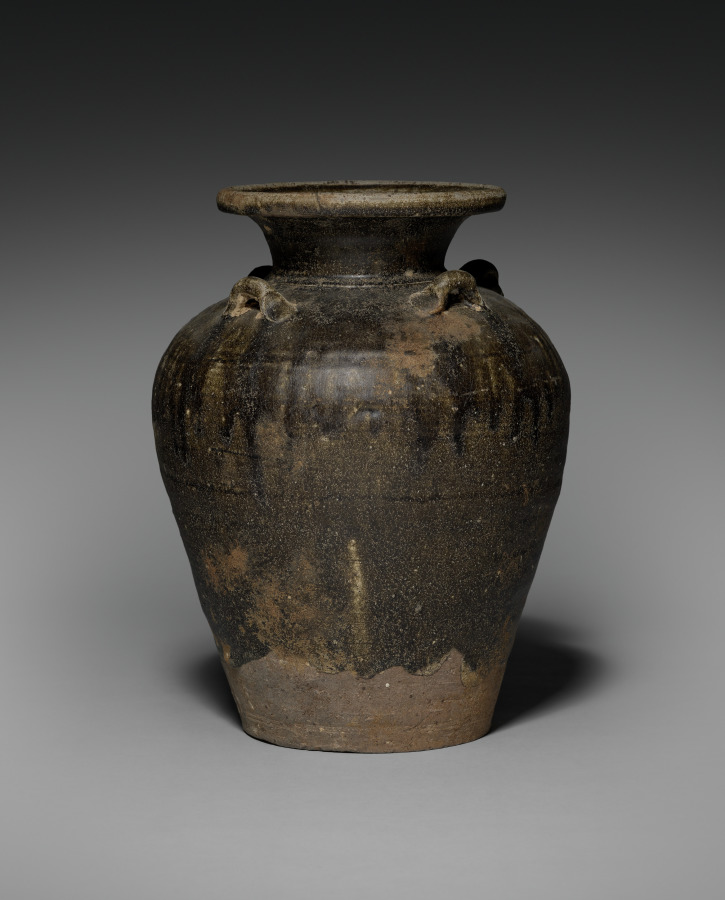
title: Storage Jar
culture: Thailand, Sawankhalok, 14th century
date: 1300s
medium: stoneware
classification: Ceramic